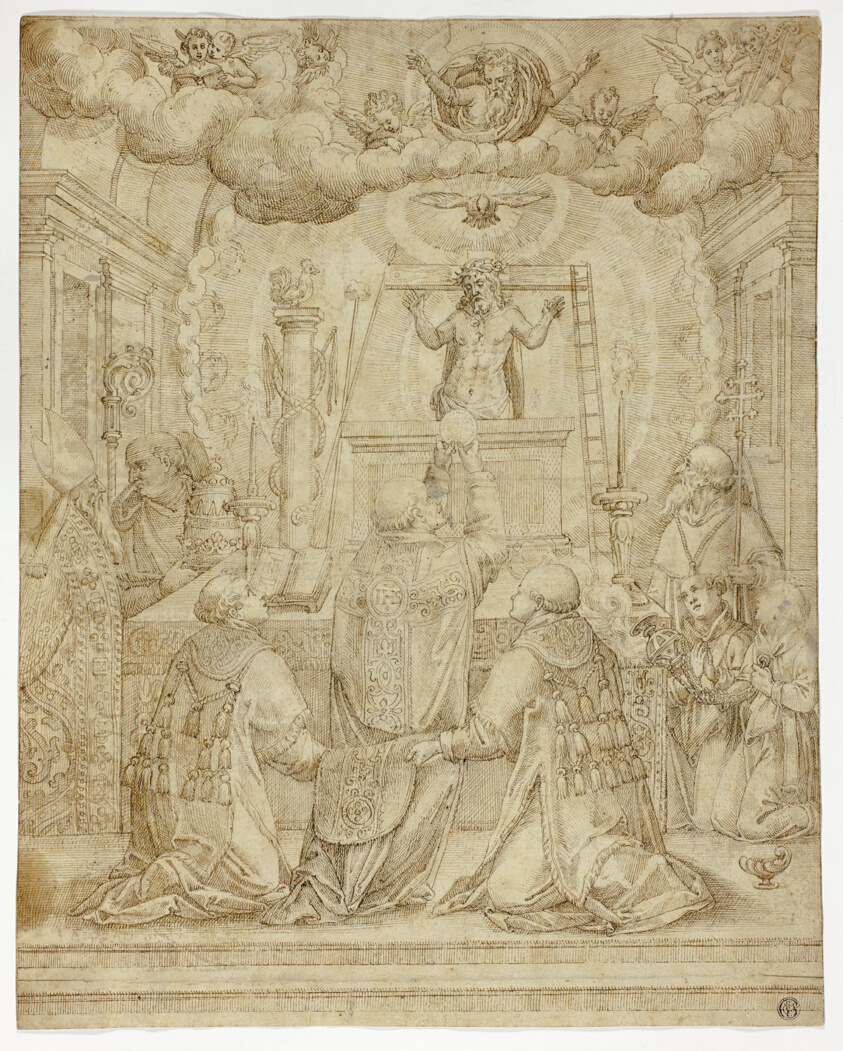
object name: Drawing and Watercolor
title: Vision of Saint Gregory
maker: Unknown Artist; possibly Flemish, 1400-1599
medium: Pen and brown ink on cream laid paper (pricked for transfer)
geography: Flanders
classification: pen and ink drawings; paper; drawings (visual works); prints and drawing